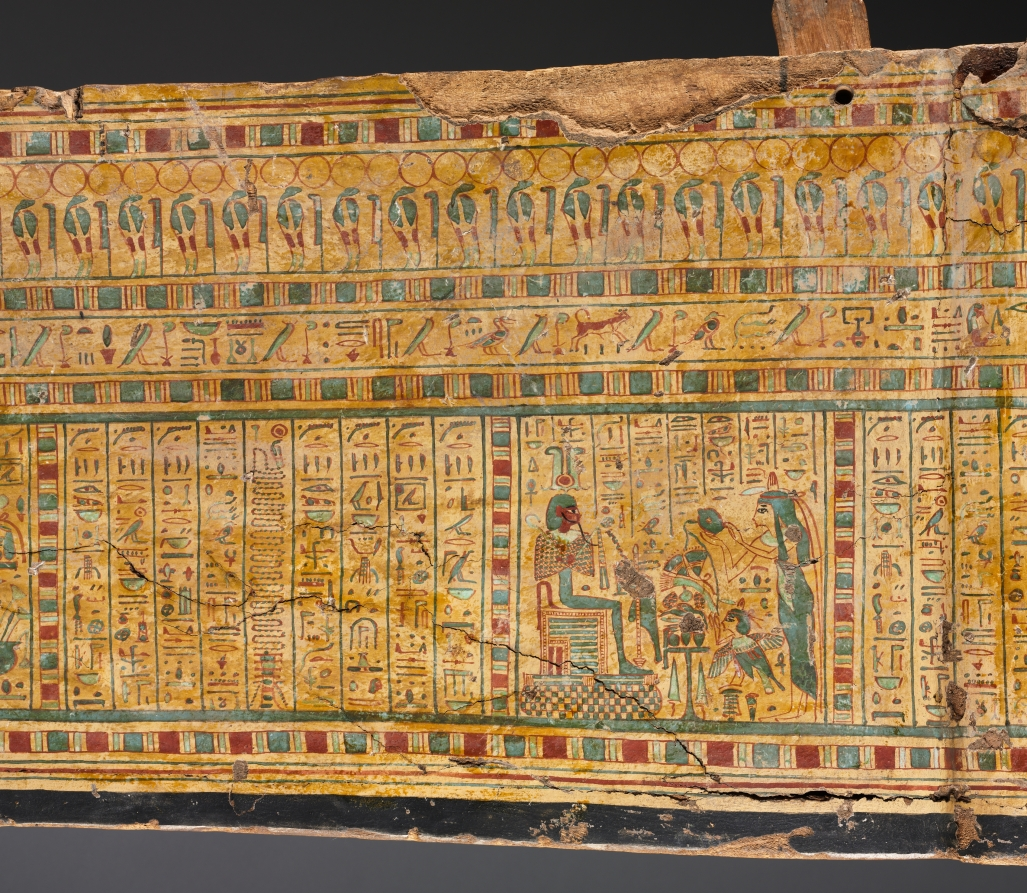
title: Coffin of Nesykhonsu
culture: Egypt, Thebes, Third Intermediate (1069–715 BCE), Dynasties 21–22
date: c. 976–889 BCE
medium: gessoed and painted sycamore fig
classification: Funerary Equipment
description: Egyptian coffins told stories and illustrated spells to help the deceased transition safely to the afterlife. Inside Nesykhonsu's coffin there are two jackals, one facing right and the other left, near the top. Here, the jackal represents the powerful deity Anubis, the god of the afterlife and embalming.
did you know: Two of Nesykhonsu's titles, "Lady of the House" and "Singer of the Choir of Mut the Great," are written on the outside of the coffin.